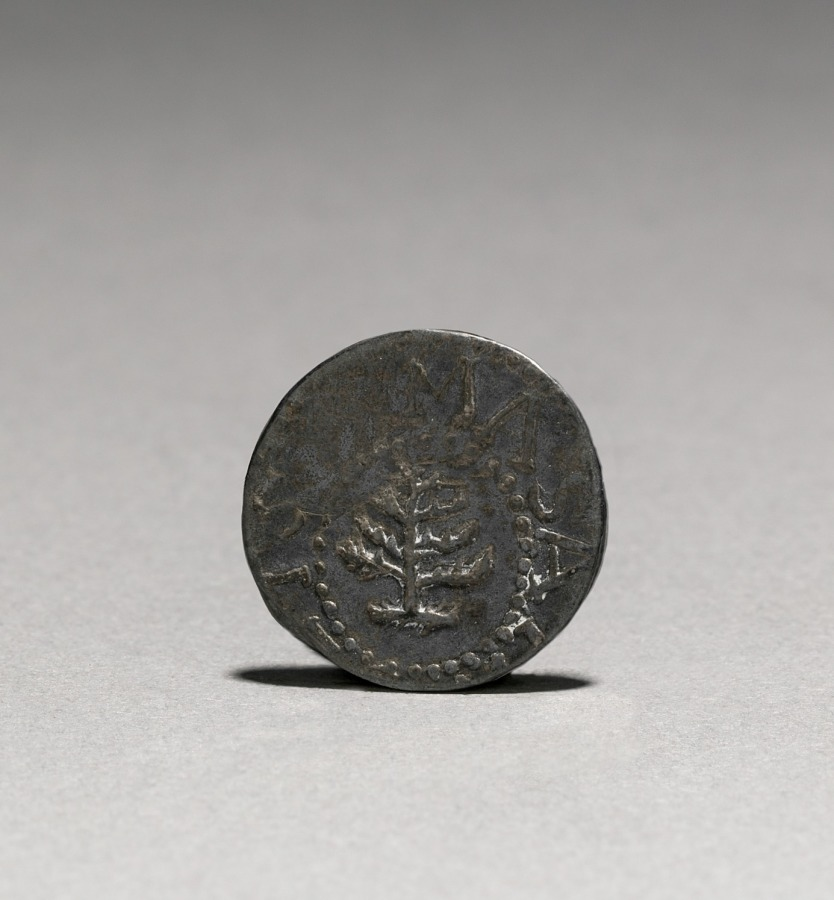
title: Pine Tree Three Pence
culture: America, Massachusetts, Boston, 17th century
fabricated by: John Hull (American, 1624–1683)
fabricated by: Robert Sanderson (American, 1609–1693)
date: 1652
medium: silver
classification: Coins